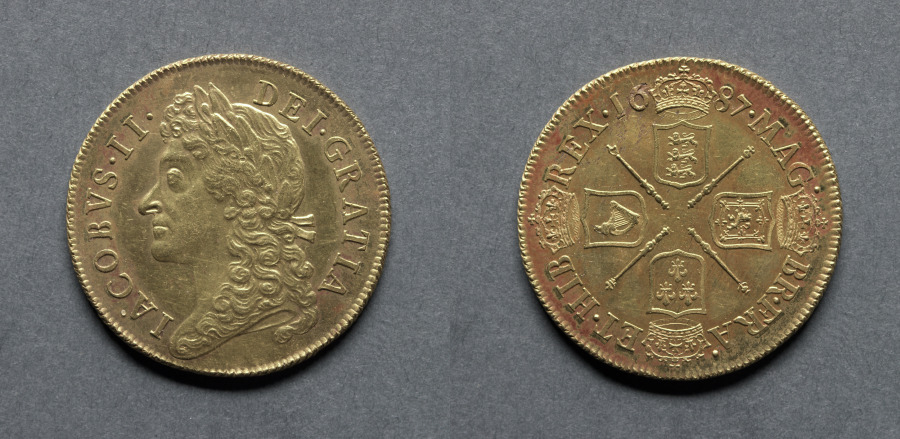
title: Two Guineas: James II (obverse); Four Shields of Arms (reverse)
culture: England, James II, 1685-1688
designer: John Roettier (British, 1631–1703)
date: 1687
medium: gold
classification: Coins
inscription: DEI GRATIA IACOEVS II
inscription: MAG BR FRA ET HIB REX 1687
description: The coin type of James II was a continuation of that of the reign of his brother, Charles II. A rare piece, this denomination was only issued in 1687 and 1688. The four gold denominations established under the reformed coinage of the previous reign were five guineas, two guineas, guinea, and half guinea.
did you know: The shields are as follows: England has three lions, Scotland has one lion, France has three fleur-de-lis, and Ireland has a harp.